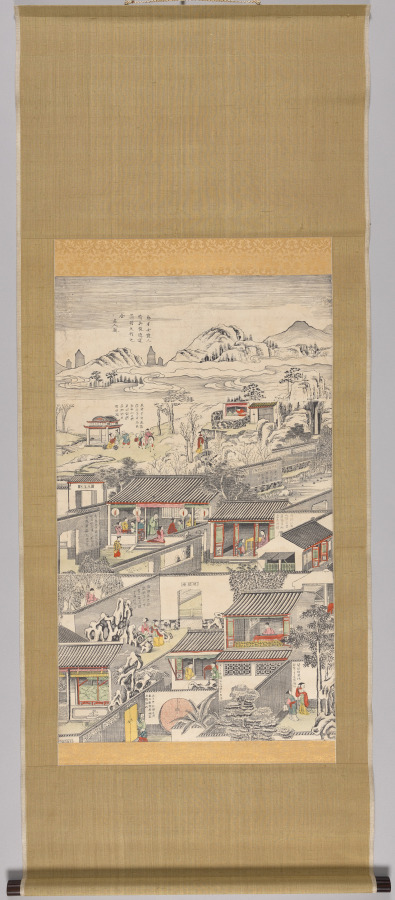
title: Part of Story of The Western Chamber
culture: China, Qing dynasty (1644–1911), Qianlong reign (1736–95)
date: 1736–95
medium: Hanging scroll; polychrome woodblock print; ink and color on paper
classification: Print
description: Woodblock printing in color reached its height in China in the 1600s to 1700s . It was executed by means of sets of separate blocks, each carved to print a different color.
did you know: In the 1600s, printing flourished in such Jiangnan cities as Nanjing, Suzhou, Hangzhou, and Huizhou, evolving from privately enjoyed illustrated books printed in color to more commercialized single-sheet color prints that were hung on walls and became part of the rich urban visual culture.